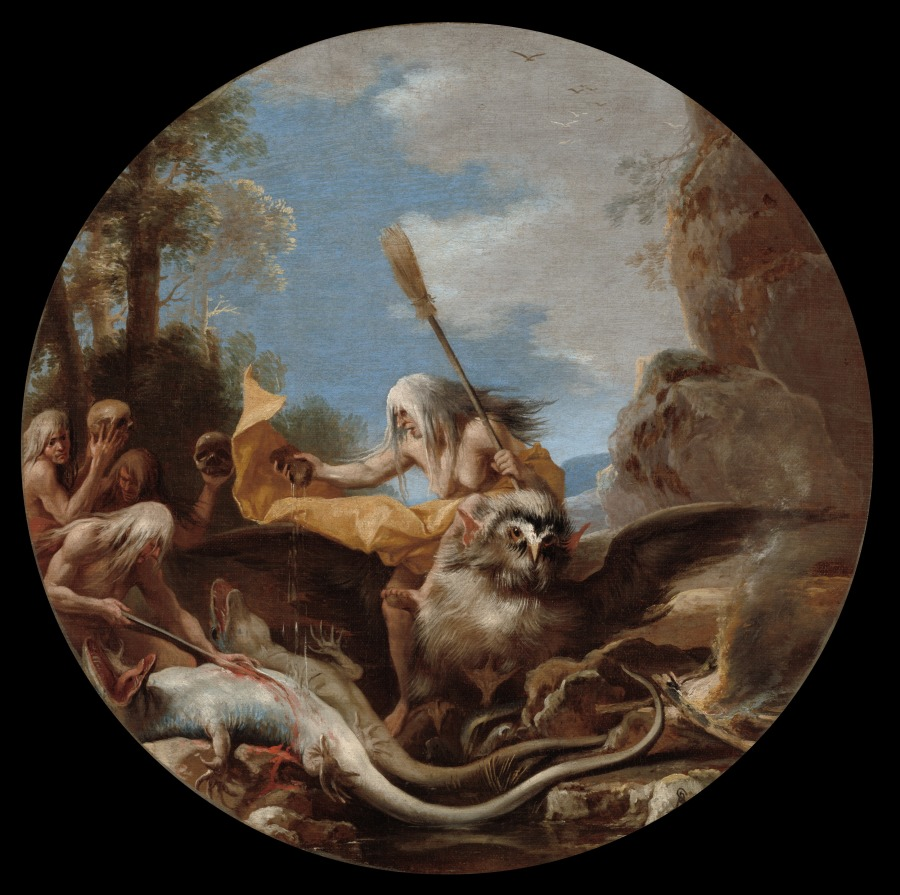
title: Scenes of Witchcraft: Day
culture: Italy, 17th century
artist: Salvator Rosa (Italian, 1615–1673)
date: c. 1645–1649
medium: oil on canvas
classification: Painting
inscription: Signed: "SR [monogram]"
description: Rosa's scene at noon showcases several hoary hags that exemplify his treatment of witches. Clutching skulls, wielding brooms, and slicing lizards, the witches prepare to travel to the Sabbath, an orgy of witches. One witch flays the skin of a thrashing lizard to extract the innards needed to concoct magical unguents, while her companions brandish skulls. Goats were the common mode of transportation for witches, but Rosa substitutes an owl, a harbinger of evil. Although Rosa foregrounds the violent cruelty of witchcraft, situating the grotesque hags in the full light of day introduces a comic aspect to the scene. Rosa's use of comedy and the unexpected to critique the world around him stemmed from the satirical poetry he wrote throughout his stay in Florence and his return to Rome in 1649. By lightening the palette and mood of the painting, Day reflects his interest in satire and his self-appointed role to expose and critique human folly.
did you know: The artist chose the painting's shape to reference the foundational role of the circle in practicing magic.